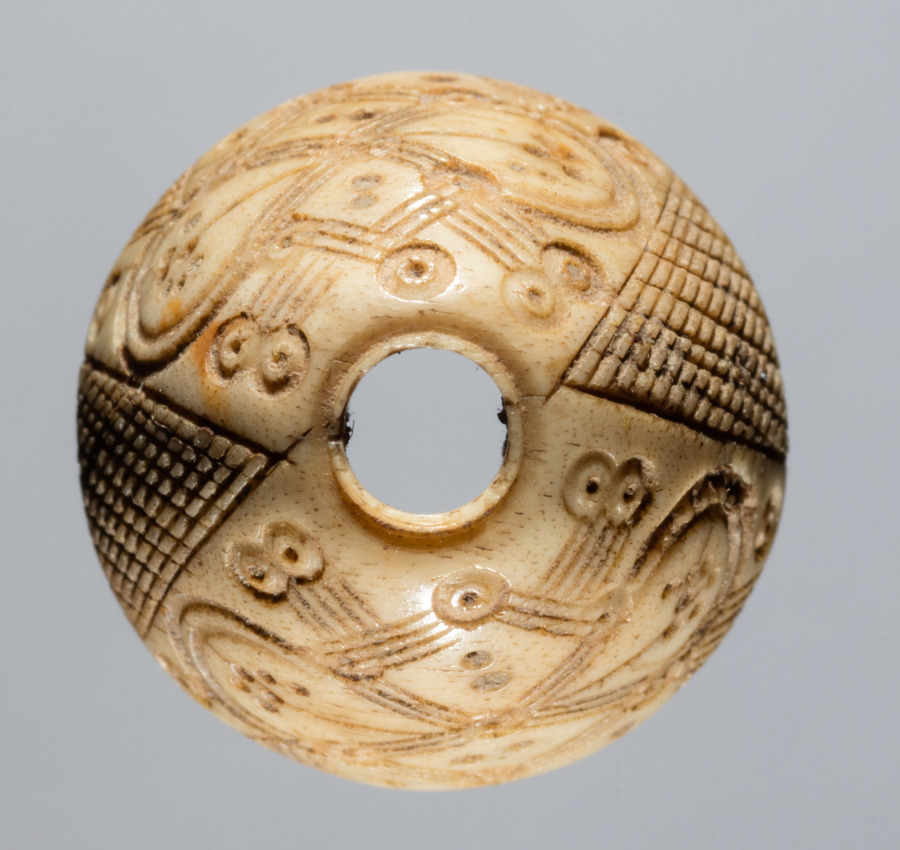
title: Spindle Whorl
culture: Iran, early Islamic period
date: 700s - 900s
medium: bone, incised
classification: Spindle Whorl